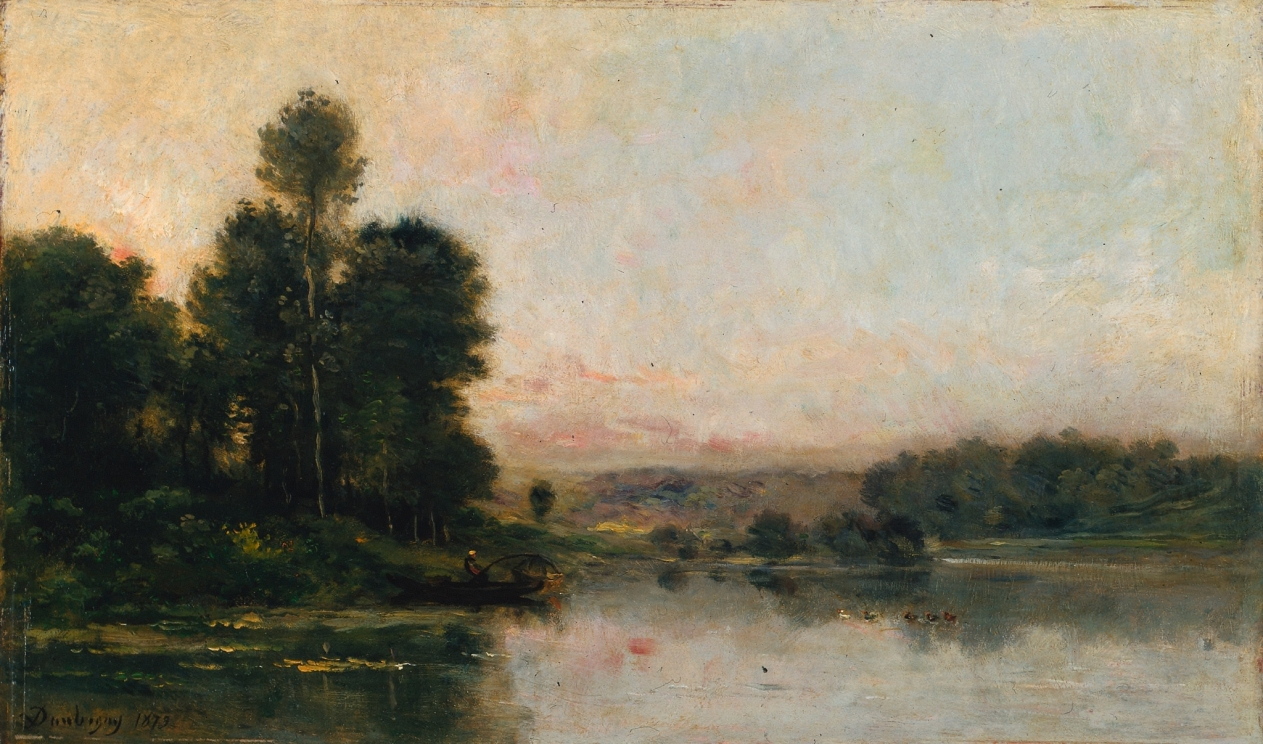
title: The Hillsides of Méry-sur-Oise, Opposite Auvers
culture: France, 19th century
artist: Charles François Daubigny (French, 1817–1878)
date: 1873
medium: oil on wood panel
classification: Painting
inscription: Signed lower left in black: Daubigny 1873